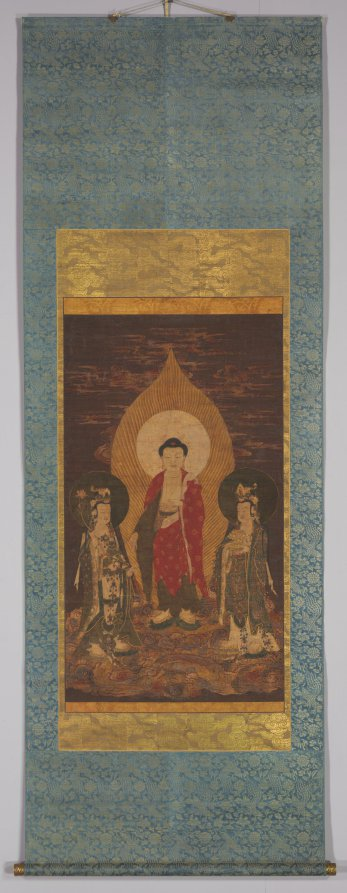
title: Amitābha Triad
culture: China, Ming dynasty (1368–1644)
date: possibly 1400s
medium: Hanging scroll; ink and color on silk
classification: Painting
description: This hanging scroll illustrates an apparition of Buddha Amitābha (阿彌陀 in Chinese) and two attendant bodhisattvas, in the midst of colorful light and swirling clouds. The one who carries a miniature image of Amitābha in its jeweled crown is Avalokiteśvara (觀音 in Chinese); the other who carries a flower vase is Mahāsthāmaprāpta (大勢至 in Chinese). Previously, this work was identified as a rare example of a Korean Buddhist painting from the early Joseon period. In contrast to surviving Korean works from this time the scroll stands out for its fine details. However, other elements such as the striped almond-shaped halo that encircles the main Buddha, firm red lines that define each deity’s facial features, and the flowing garments may identify it as an early Ming period Chinese Buddhist painting.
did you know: Amita is flanked by a pair of bodhisattvas, compassionate beings who aid others to reach enlightenment.